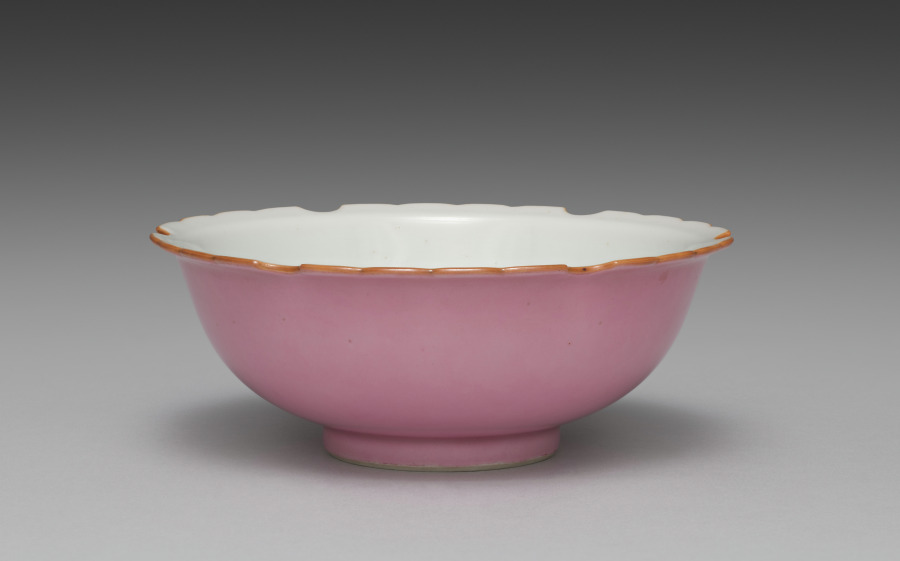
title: Dish from Snow-Flake Side Dishes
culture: Japan, Meiji period (1868–1912)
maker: Seifū Yohei III (Japanese, 1851–1914)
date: 1893–1914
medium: One from a set of six porcelain dishes; porcelain with lobed rims and pink glaze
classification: Ceramic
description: According to the box lid, this set of 6 side dishes, or mukōzuke, are “snow-flower style” (sekkashiki), having mouths shaped like snowflakes. Their mouths, which have 6 lobes and scalloped edges, are traced with brown iron oxide at the rim. The outside of each bowl is glazed with a very bright pink over the basin and foot, and the inside is left white. From directly above, one sees a snowflake-like shape, and from the side, they seem to float above a rosy ground.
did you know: The box for this set of dishes has an inscription on the side noting that they were for a person with the family name Nakamoto.